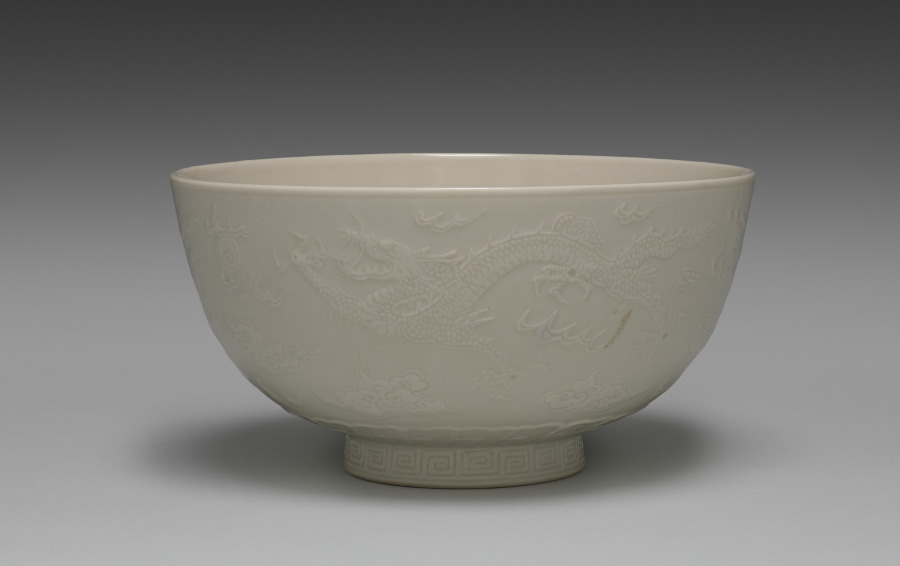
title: Bowl with Dragons Chasing Flaming Jewels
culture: Japan, Meiji period (1868–1912) to Taishō period (1912–26)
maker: Seifū Yohei III (Japanese, 1851–1914)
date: 1893–97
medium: Porcelain with molded and carved design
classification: Ceramic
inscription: 大日本清風造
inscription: 清風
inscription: 清風與平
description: The decoration of this large bowl, described as a donburi on one side of its box, is executed entirely in molded and carved relief under a creamy, pink-tinged translucent glaze. The main motif is a pair of four-clawed dragons pursuing flaming jewels. As is standard for this design, the beasts are surrounded by wisps of cloud, and a foliate pattern runs around the bottom of the basin. A geometric pattern circles the exterior of the footring. The white-on-white design makes the bowl subtle and elegant.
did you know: Kyoto-based Japanese ceramist Seifū Yohei III (1851–1914) admired the glaze colors found on Chinese porcelain and tried to replicate them through intensive experimentation.